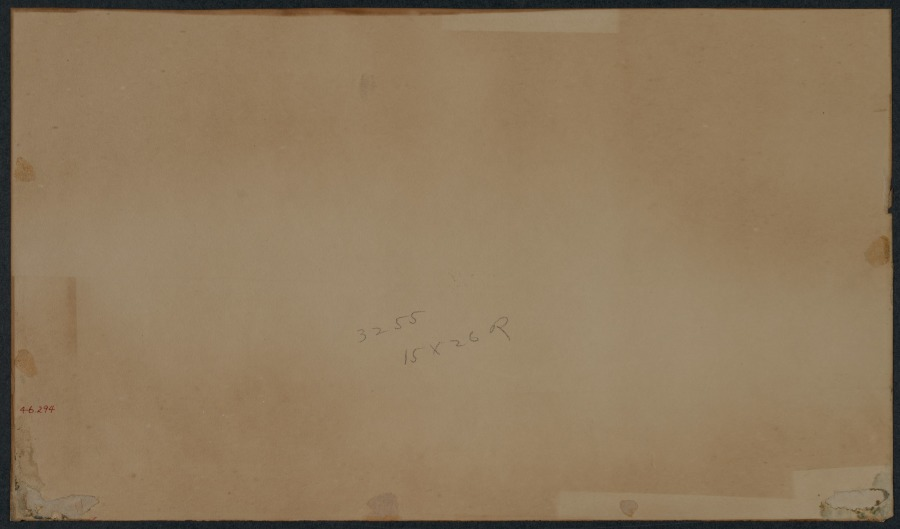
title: Landscape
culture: England, 19th century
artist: Thomas Francis Wainwright (British, 1899)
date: 1885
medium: watercolor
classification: Drawing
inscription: Signed, lower left: "T.F. Wainewright 1885"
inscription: Label, verso, upper center: "Max Williams, N.Y."